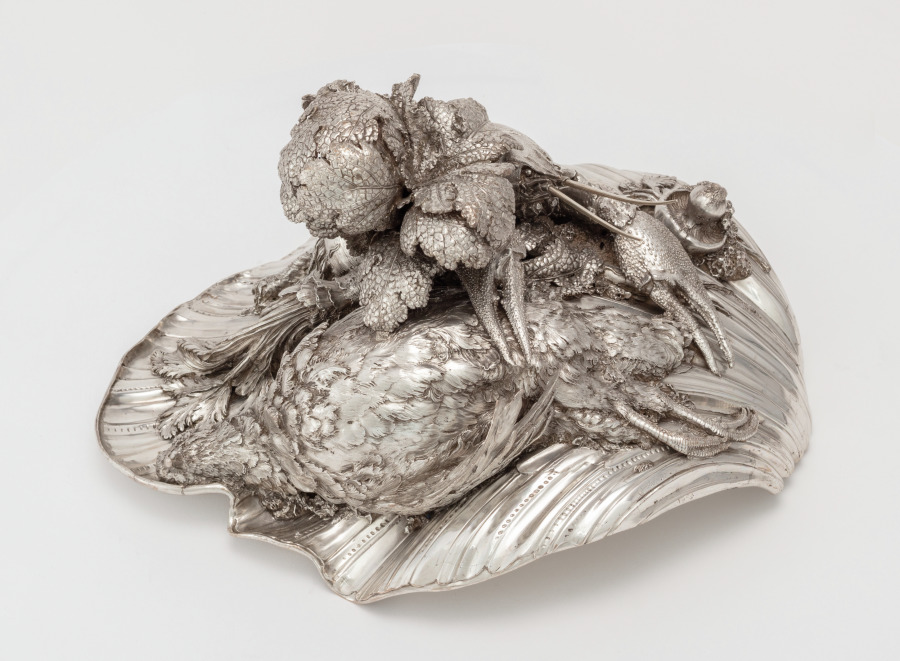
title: Cover for a Tureen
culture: France, Paris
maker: Henry Adnet (French, 1745)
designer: Juste-Aurèle Meissonnier (French, 1695–1750)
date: 1735–38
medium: silver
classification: Silver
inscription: engraved Meissonnier signature.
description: See entry for cover record 1977.182.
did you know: The langoustine, pigeon, and vegetables were cast using real examples giving the silver copies lifelike detail and appearance.